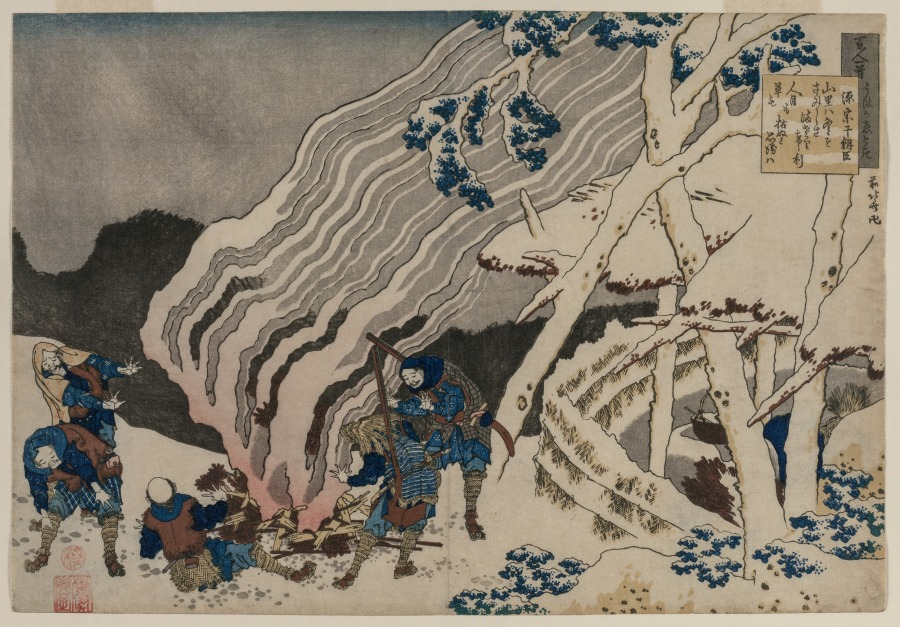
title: Poem by Minamoto no Muneyuki from the series One Hundred Poems by One Hundred Poets Explained by the Nurse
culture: Japan, Edo period (1615–1868)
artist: Katsushika Hokusai (Japanese, 1760–1849)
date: 1835–36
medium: Color woodblock print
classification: Print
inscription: Signature: Zen Hokusai Manji. Publisher: Iseya Sanjiro (Eijudo). Censorship Seal: kiwame.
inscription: In the mountain village,/ it is in winter that my loneliness/ increases most,/ when I think of how both have dried up,/ the grasses and people’s visits. —Translation by Joshua Mostow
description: Katsushika Hokusai designed this print series from the perspective of a confused nurse attempting to illustrate classical poetry but missing the subtle allusions. This interpretation creates what would have been considered a comical disconnect between poem and image. The poem on this print reads as follows: In the mountain village, it is in winter that my loneliness increases most, when I think of how both have dried up, the grasses and people’s visits. —Translation by Joshua Mostow While nobleman Minamoto no Muneyuki (died 939) wrote of dying grasses, the nurse imagines instead a lively scene of hunters warming themselves around a fire.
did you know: This impression of Hokusai's print has a fold along its center, indicating that it may have once been placed in an album of the book format.